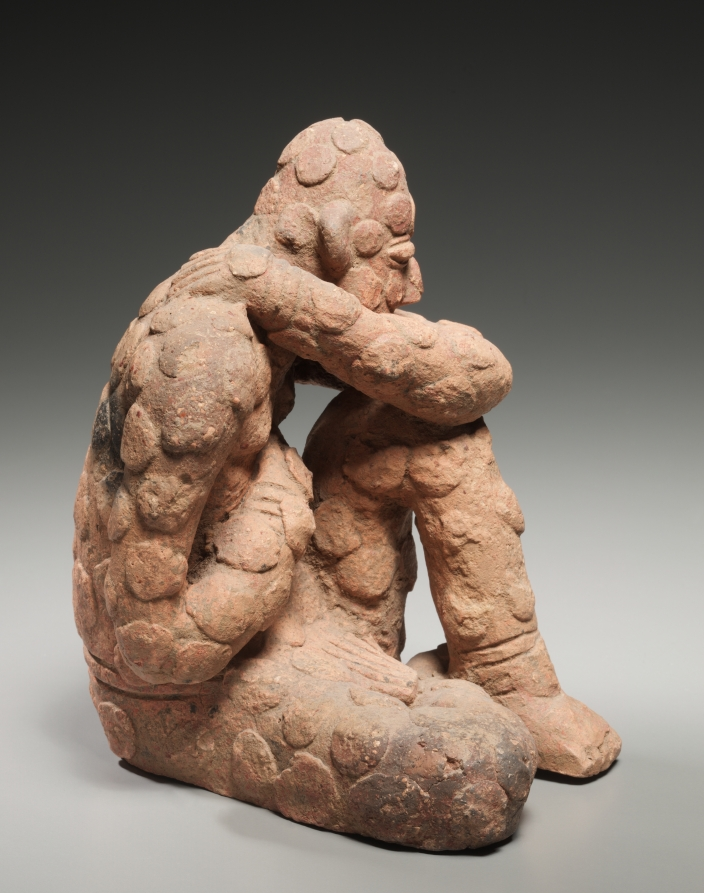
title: Male Figure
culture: Africa, West Africa, Mali, probably Djenné-Djenno, Inland Niger Delta culture-style maker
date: possibly 1300s–1600s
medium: Terracotta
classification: Sculpture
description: Figures like this would have been used in rituals by the ancestors of the present-day inhabitants of the Inland Niger Delta. Representing the gods and kings or queens associated with the region’s former residents, the figures received prayers and offerings in exchange for their support. The seated position of this male has been interpreted as a harmful pose intended to bring death to an individual.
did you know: While we don’t know who made this work, it can be hypothesized that it was a woman; today, as in much of Africa, potters in Mali are female.